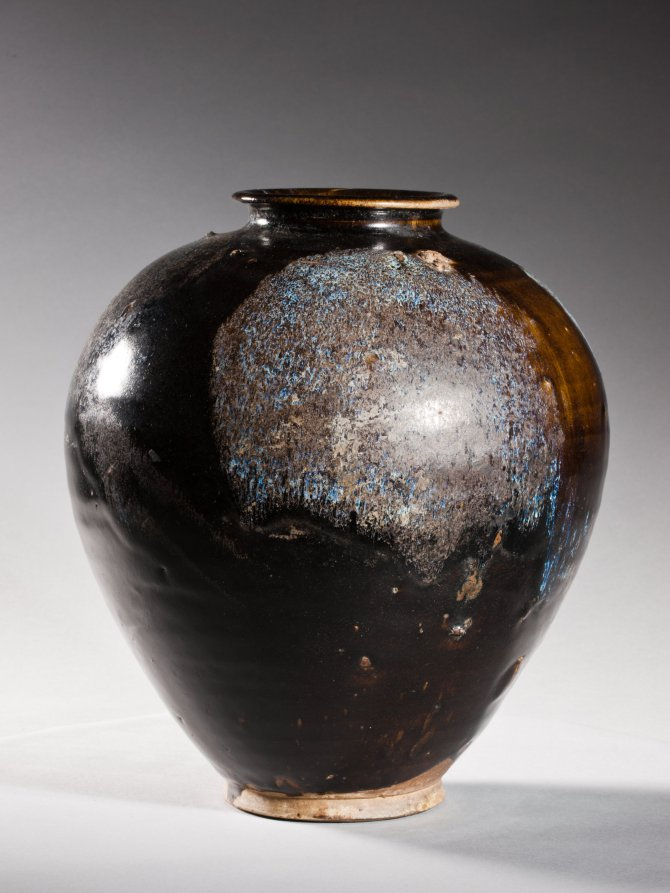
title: Jar: Black Ware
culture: China, Henan province, Huangdao kilns, Tang dynasty (618-907)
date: 700s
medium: glazed stoneware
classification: Ceramic